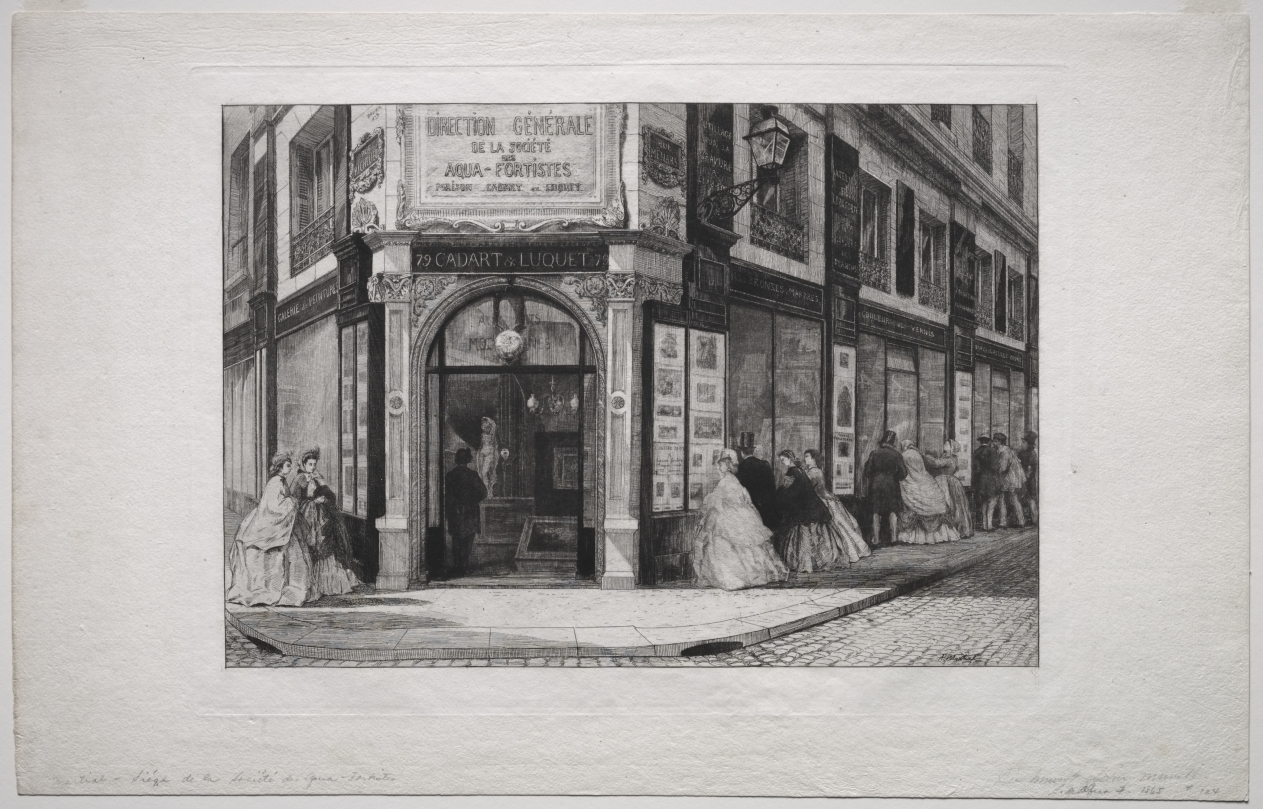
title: Headquarters of the Société des Aquafortistes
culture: France, 19th century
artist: Adolphe Théodore Jules Martial Potémont (French, 1828–1883)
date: 1864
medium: etching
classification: Print